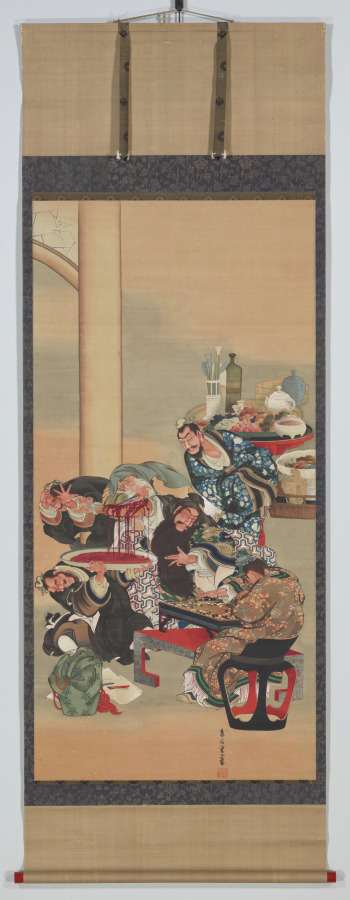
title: Operating on Guan Yu's Arm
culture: Japan, Edo period (1615–1868)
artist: Katsushika Ōi (Japanese, c. 1800-after 1857)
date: 1840s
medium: hanging scroll; ink, color, and gold on silk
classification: Painting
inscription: 款記「應為栄女筆」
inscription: 「葛しか」白文方印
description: Ukiyo-e artists’ subject matter extended to popular literature. Katsushika Ōi used color to great effect in her gruesome version of an episode from a 14th-century Chinese novel, Romance of the Three Kingdoms. Ōi portrayed the passage in which legendary 3rd-century military leader Guan Yu undergoes a bone scraping to remove poisons received from an arrow wound. In this sensationalist portrayal, Guan Yu’s attendants cower at the sight of his bloody arm while he remains unflinchingly focused on his game. As a woman, Ōi was an outlier in her era, but her talent was allowed to shine due to collaboration with her father, Katsushika Hokusai (1760–1849), the famed designer of the print known as The Great Wave.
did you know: This is the largest surviving painting by the artist.